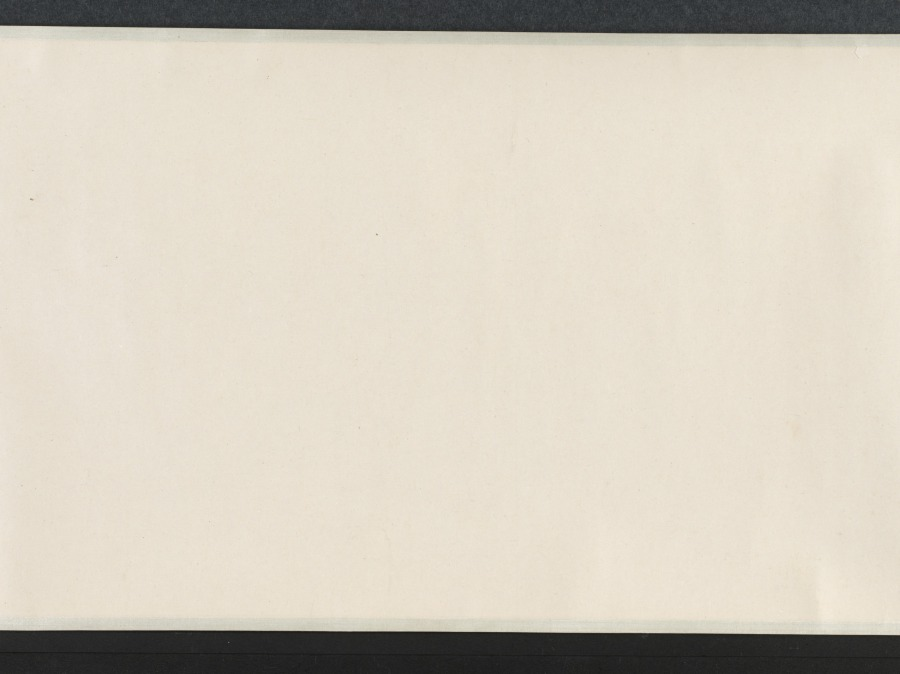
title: Nine Songs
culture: China, Yuan dynasty (1271-1368)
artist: Zhang Wo (Chinese, active c.1336–after 1364)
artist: Chu Huan (Chinese, active 1361)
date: 1361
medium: handscroll; ink on paper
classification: Painting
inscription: 7 colophons and 47 seals: 1 colophon, dated 1361, and 28 seals of Chu Huan 褚奐 (active c. 1361); 1 colophon, dated 1785, and 1 seal of Lu Shihua 陸時化 (1714-1779); 2 seals of Lu Yü-ch'ing (18th c.); 1 colophon, dated 1935, of Ye Gongchuo 葉恭綽 (1881-1968); 1 colophon, dated 1935, of Wu Hufan 吳湖帆(1894–1968); 1 colophon, dated 1938, and 1 seal of Wang Tongyu 王同愈 (1856-1941); 1 colophon, dated 1941, of Wu Huayuan 吳華源 (1893-1972); 1 colophon, dated 1942, and 9 seals of Xu Bangda 徐邦達 (1911–2012); 1 colophon, dated 1942, of Lang Jingshan 郎靜山 (1892-1995); 1 colophon, dated 1944, of Tang Yun 唐雲 (1910-1993); 6 seals of Wang Jiqian [C.C. Wang] 王季遷 (1907–2003).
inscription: Text of The Nine Songs written by Chu Huan at the end of each section.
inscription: 右離騷九歌圖，宋龍溟居士李公本，淮南張渥叔厚所畫妙絕當世。家藏請予書其辭目識于左。至正二十一年辛醜三月旦河南褚奐記。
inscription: Colophon by Lu Shihua 陸時化 (1714–1789): This scroll is fortunate to have been handed down from collections of the right people. Now, after 500 years, its condition is as good as when it was painted. I acquired this from Mr. Shen Guiyu [1673-1769], the President of the Board of Rites. The label is in his handwriting when he was 95 years old. I submit that Chu Huan (t. Shiwen) of the Yuan Dynasty was a native of Qiantang. His "seal" and li writings are in the style of Wu Rui. For example, in [Chu Kuei's] Ming ji lu [A list of masterpieces] is recorded the stele commemorating the restoration of the prefectural school of Kun-shan, the text of which was composed by Yang Weizhen in the twenty-first year of Zhizheng [1361]; and the calligraphy as well as the title in li style was by Chu Huan, who was at that time an assistant judge of the prefecture of Haining in the circuit of Hangzhou. Zhang Wo's zi is Shuhou (叔厚). His literary name is Zhen Qisheng (贞期生). According to [Gu Ying's] Yu shan cao tang ya jii, he liked to paint in the bai-miao or the "pure delineation" style after the method of Li Longmian [Li Gonglin 李公麟], which finds no peer among the ancient masters. This is agreed upon [by Pei Ch'iung] in his Qing jiang zhi who praised [Zhang Wo] as being quite learned and well-versed in many branches of the arts, especially figure painting. Recorded by Lu Shihua [The mountain dweller], listening to the pine, in the twelfth month of the yisi year [1785].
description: Painted in the baimiao, or fine-line drawing style, this ancient work demonstrates the literati’s use of abstract calligraphic brushwork for self-expression. The subject of the “Nine Songs”—songs associated with shamanistic rituals in the ancient Chu kingdom—had traditionally provided artists with myths and legends that they could explore and reinterpret in their own works.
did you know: Divided into eleven sections, the scroll contains illustrations by painter Zhang Wu followed by a transcription of the relevant verse by calligrapher Chu Huan.